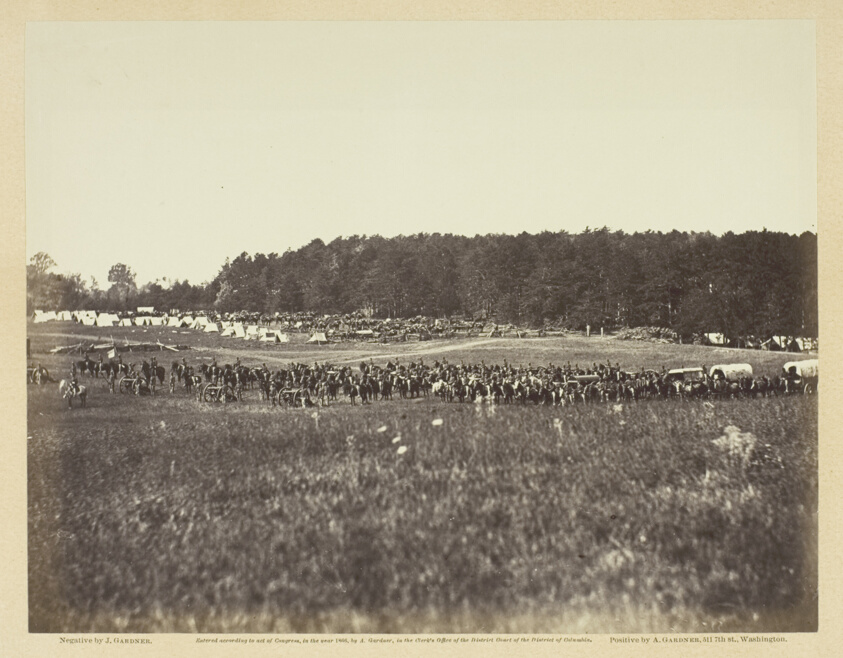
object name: Photograph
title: Battery A, Fourth U.S. Artillery, Robertson's Brigade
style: 19th century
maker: James Gardner (American, born Scotland, 1832–after 1865)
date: February 1864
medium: Albumen print, pl. 59 from the album "Gardner's Photographic Sketch Book of the War, Volume II" (1866)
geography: United States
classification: photograph; albumen silver print; photography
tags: Collected by Hugh Edwards, Gardner's Photographic Sketch Book